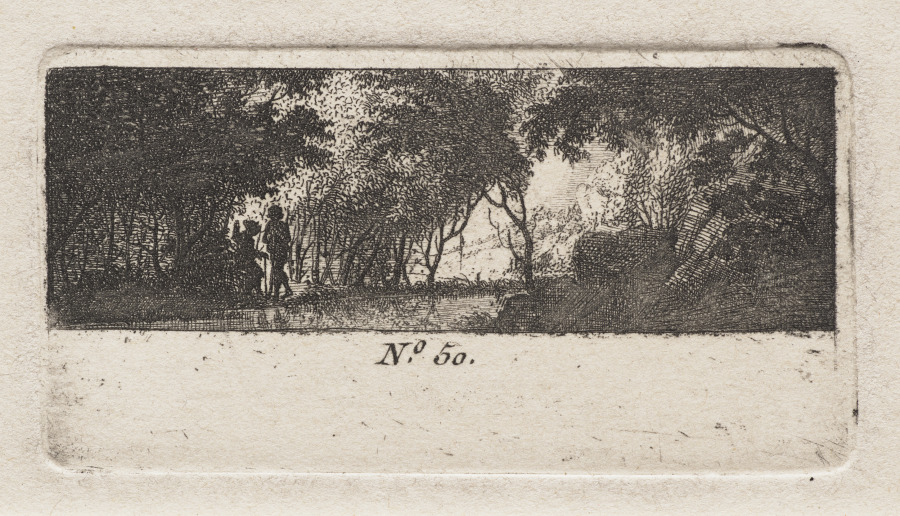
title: View of a Woods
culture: France, 18th century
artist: Antoine de Marcenay de Ghuy (French, 1724–1811)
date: c. 1778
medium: etching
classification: Print